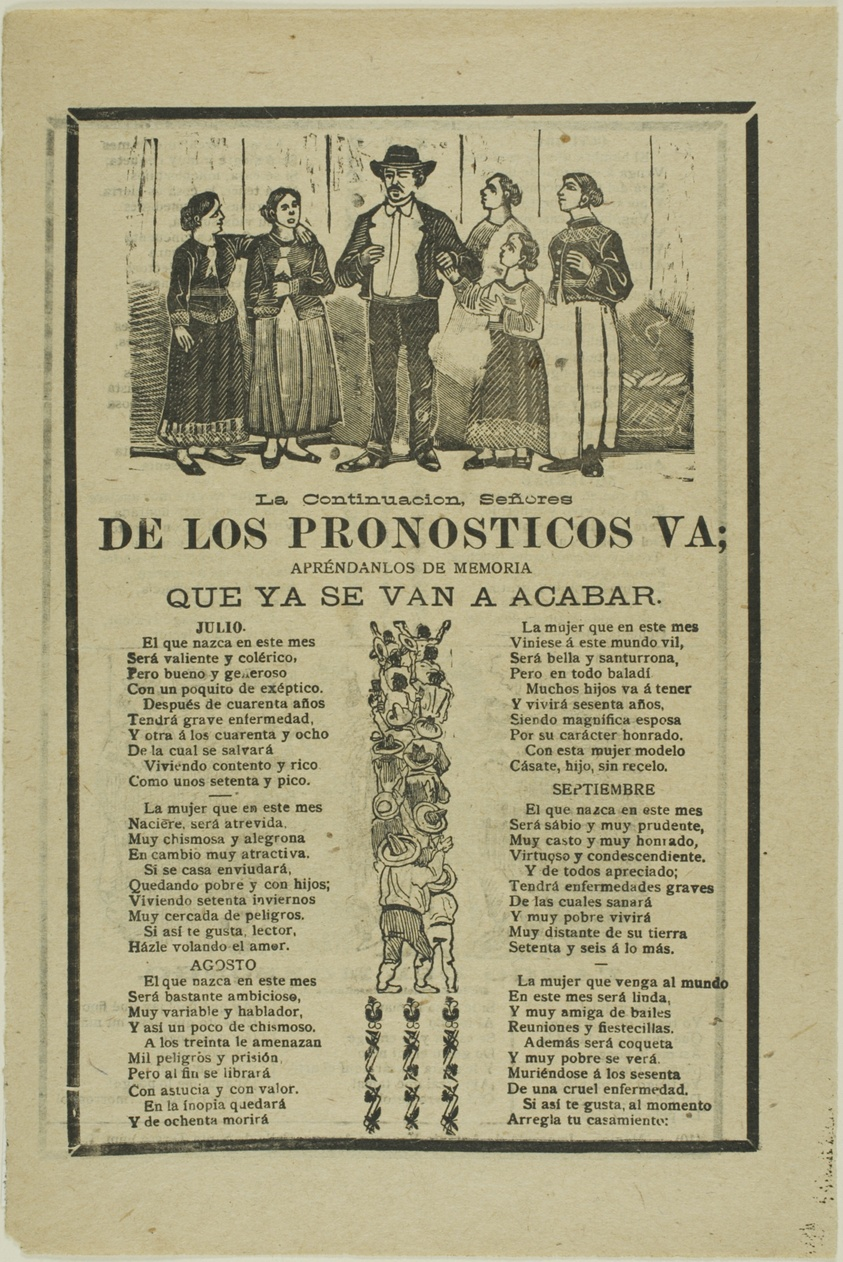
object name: Print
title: The Continuation, Sirs, of the Forecasts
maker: José Guadalupe Posada (Mexican, 1852-1913)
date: 1902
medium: Double-sided relief engraving on paper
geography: Mexico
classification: woodcut; print; prints and drawing